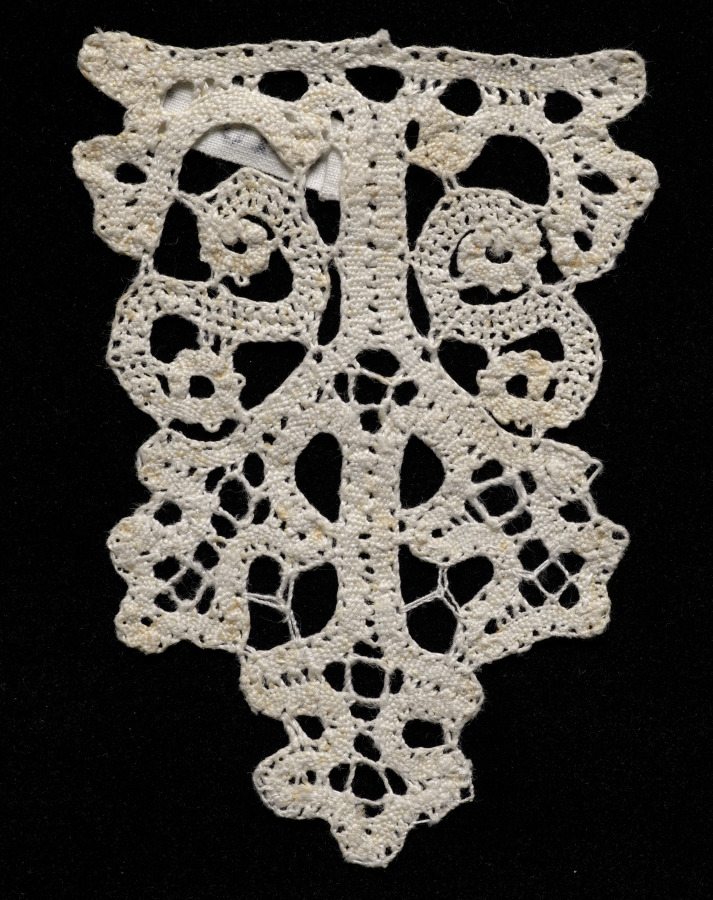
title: Lace Point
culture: Italy, Milan ?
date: 1600s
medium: Bobbin lace (bride ground)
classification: Lace